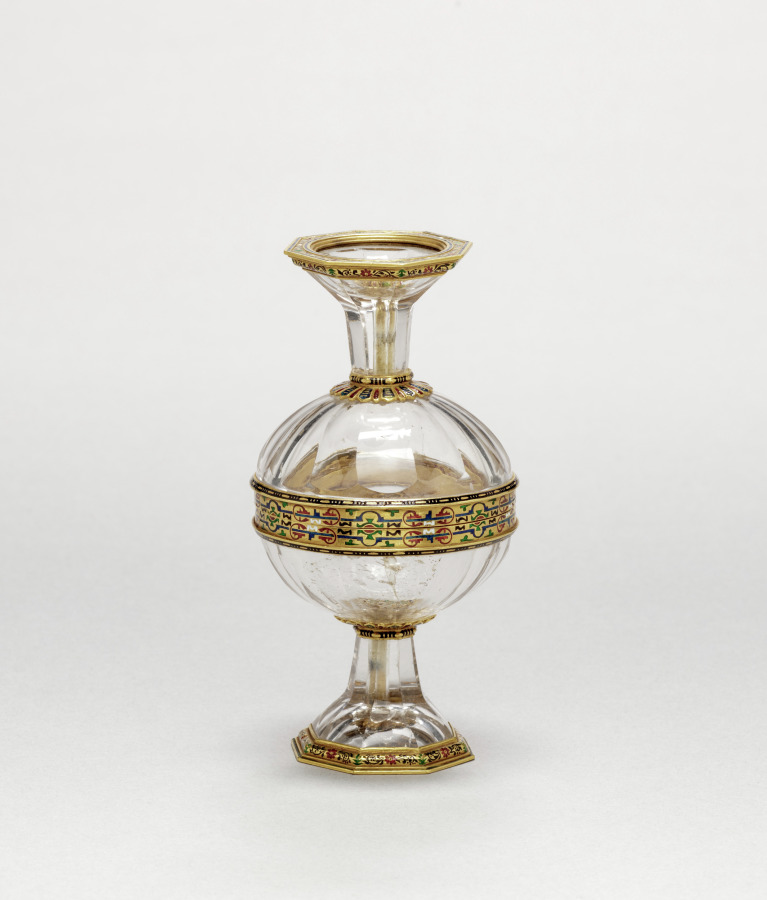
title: Double Cup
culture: Italy, late 16th century (possibly 19th century forgery, or 16th and 19th century pastiche)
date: late 16th century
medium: rock crystal set in enameled gold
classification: Enamel